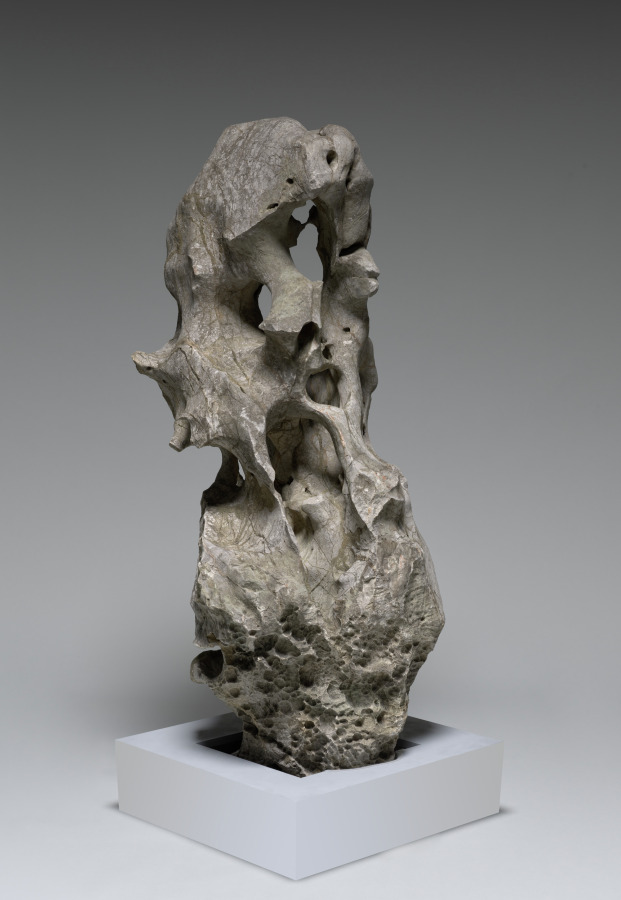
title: Taihu Garden Stone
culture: China, Jiangsu province, Wuxi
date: 0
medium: Limestone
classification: Stone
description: In China, rocks are considered elements of nature that possess spirit and life energy. With its upward winding masses, perforations, weathered surface, and multiple viewpoints, the stone exhibits sculptural qualities and embodies constant transformation through natural forces and human intervention. A solid piece of rock, it was originally sourced from the Lake Tai region. Stones were collected, set up in gardens, or installed on scholar’s desks as miniature mountains. Traditionally, Taihu stones were the most desirable type of rock. This stone is a gift by the contemporary artist Liu Dan, known for his depictions of rocks, who calls them "the stem cells of Chinese landscape."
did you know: The donor, Liu Dan, is the most prominent and celebrated painter of rocks in contemporary China.